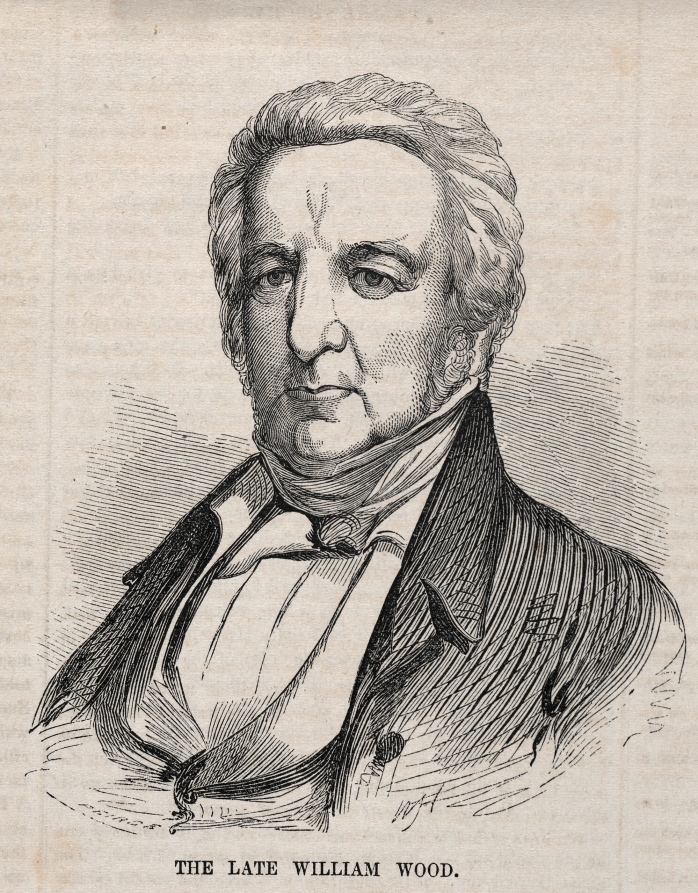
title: The Late William Wood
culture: America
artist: Winslow Homer (American, 1836–1910)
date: 1857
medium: wood engraving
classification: Print